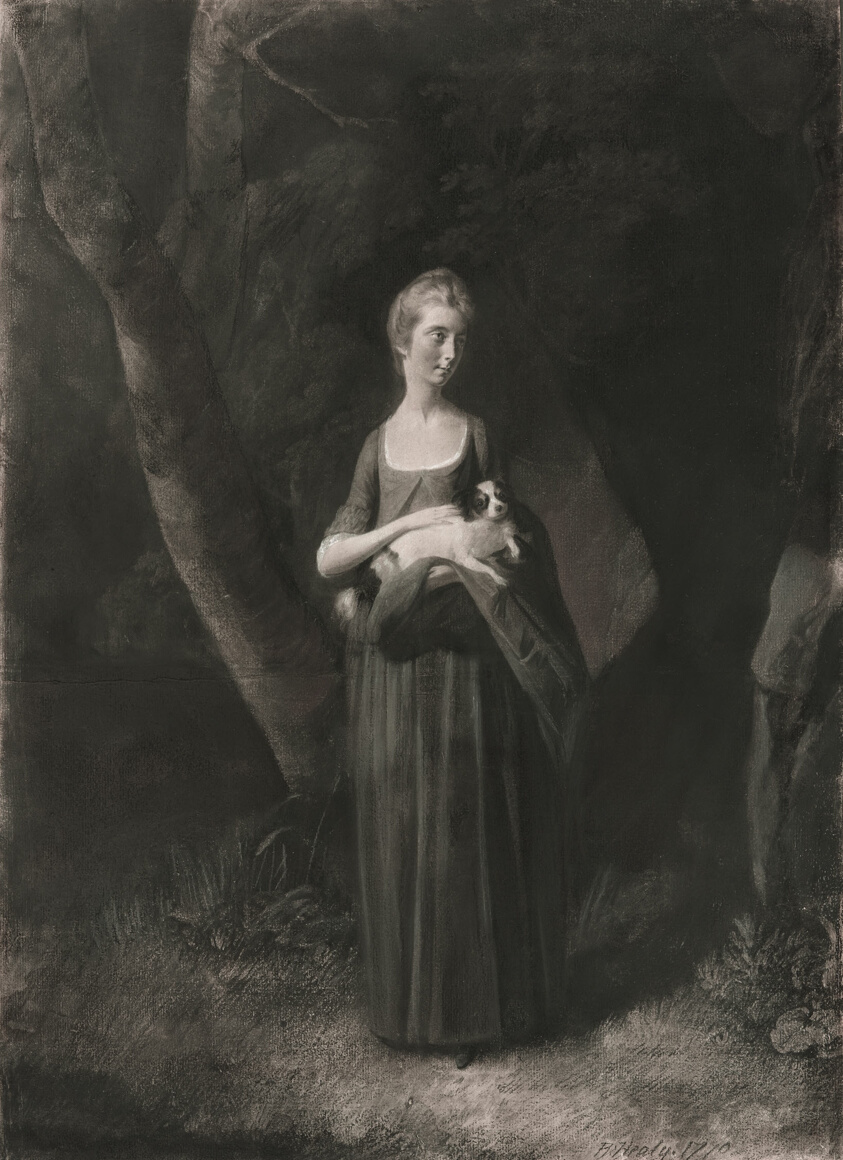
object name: Drawing and Watercolor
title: Miss Cunningham Holding Her King Charles Spaniel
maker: Robert Healy (Irish, 1743-1771)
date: 1770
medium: Black chalk, charcoal, and gouache, with stumping, scratching, and erasing, heightened with white chalk, on ivory laid paper, laid down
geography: Ireland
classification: chalk; paper; prints and drawing